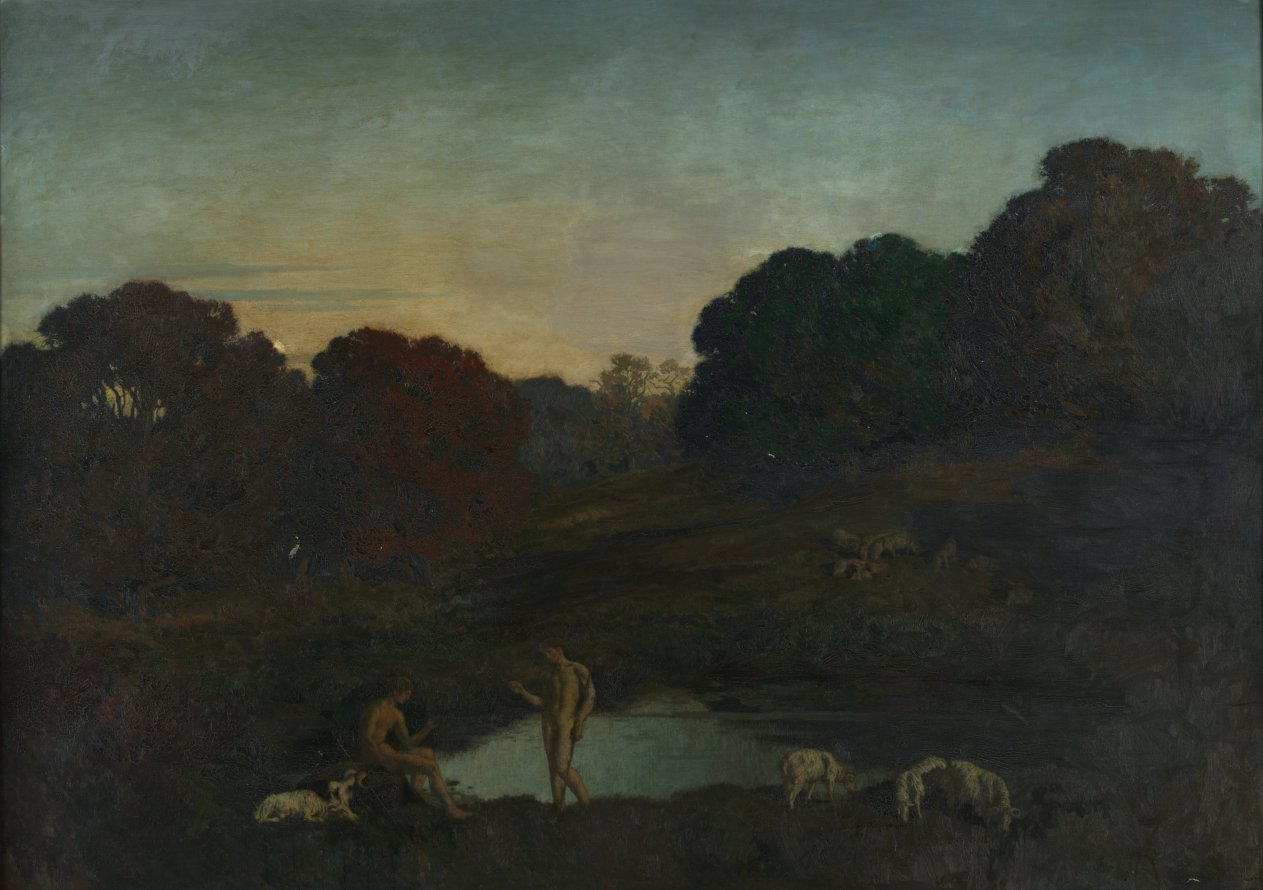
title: Pastoral Scene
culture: France, 20th century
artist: René Ménard (French, 1862–1930)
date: 1911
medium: oil on fabric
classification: Painting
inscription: Signed in lower right: E. R. Ménard 1911